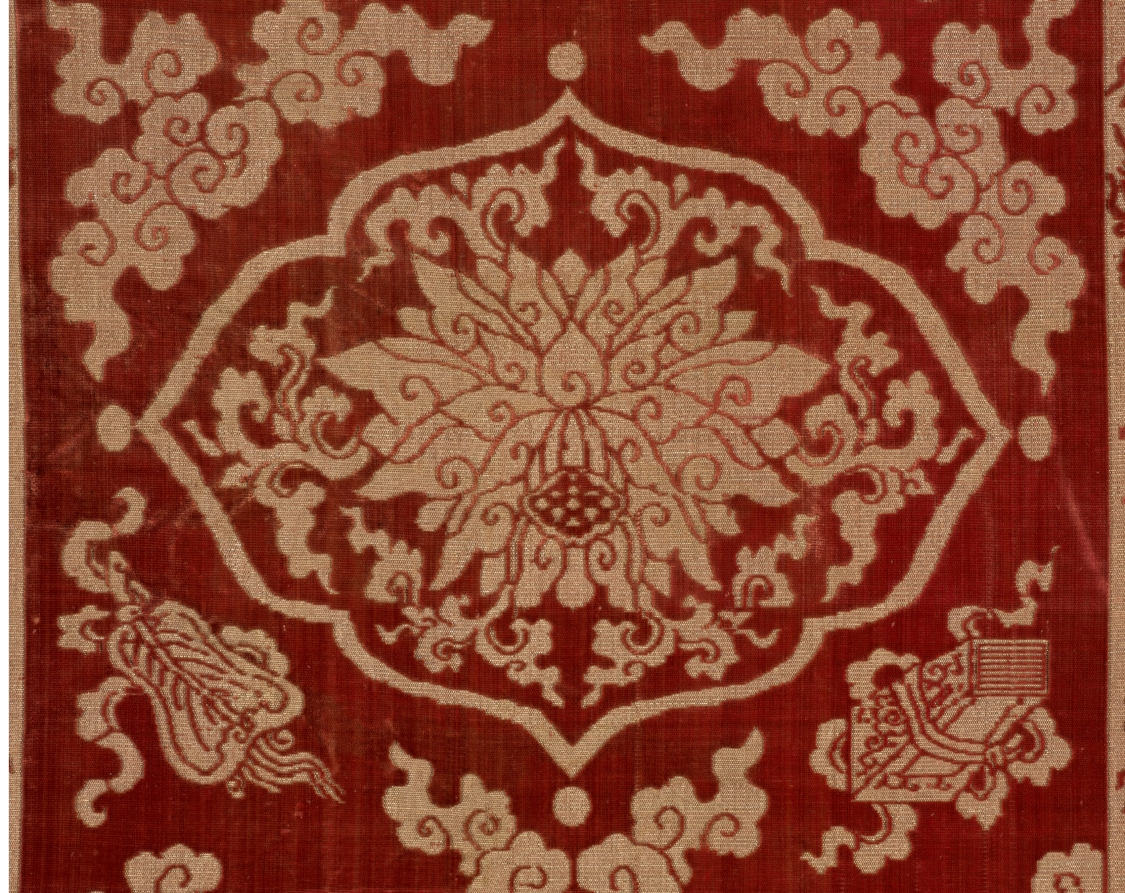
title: Velvet Strip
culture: China, Qing dynasty (1644-1911)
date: mid-1800s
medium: Velvet and gold thread; brocade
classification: Velvet